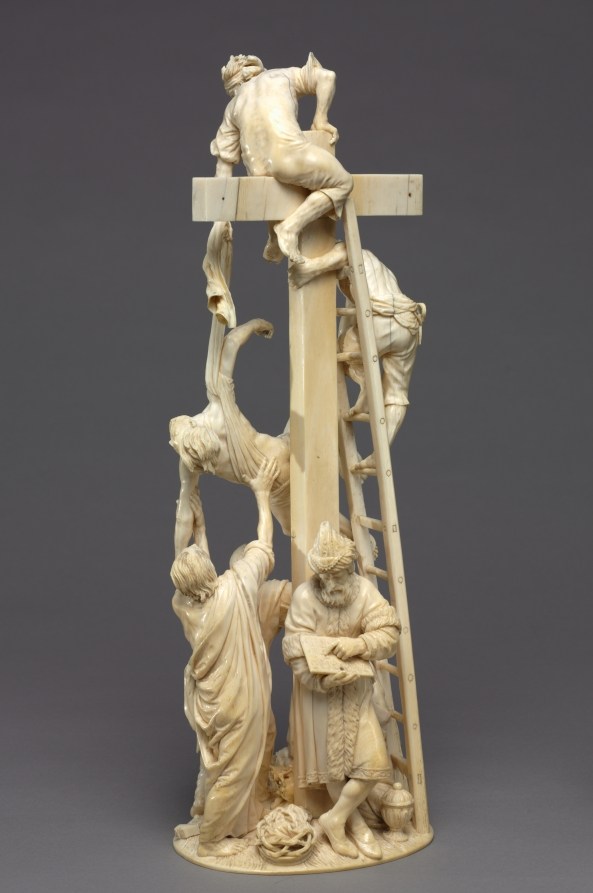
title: Descent from the Cross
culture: Austria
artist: Adam Lenckhardt (German, 1610–1661)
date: 1653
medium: ivory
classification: Sculpture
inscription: inscribed with monogram "AL" conjoined and dated 1653.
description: Carved from a single piece of ivory for Prince Karl Eusebius von Liechtenstein of Vienna, this work is a true tour-de-force. It took Lenckhardt seven years to complete; it is his last known sculpture and the pinnacle of his career. The biblical accounts of the descent from the cross found in the gospels are not consistent, which may contribute to the difficulty in precisely identifying the figures. The Virgin Mary, Saint John, Mary Magdalene, and others were said to be present, but undoubtedly there are other disciples here mourning Christ’s death. The intense emotion registers on the faces of the figures in the scrupulous and exquisitely detailed work.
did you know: Carved from a single elephant tusk, the artist took special care to ensure the ivory did not crack or break as he meticulously crafted each figure in this visually exciting sculpture. Look closely to find tools and small objects included near its base.